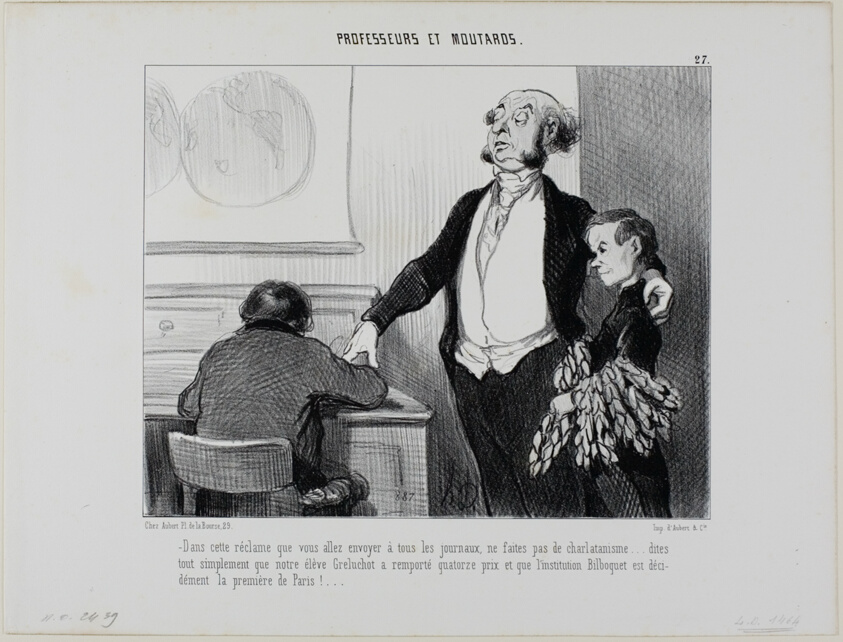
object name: Print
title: “- Please no exaggerations in this article which goes to all the newspapers. Write only that our pupil Greluchot has received fourteen prizes and that there is no doubt that the Institute Bilboquet is the finest in all of Paris!,” plate 27 from Professeurs Et Moutards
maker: Honoré Victorin Daumier; French, 1808-1879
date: 1846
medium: Lithograph in black on white wove paper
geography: France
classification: lithograph; print; prints and drawing